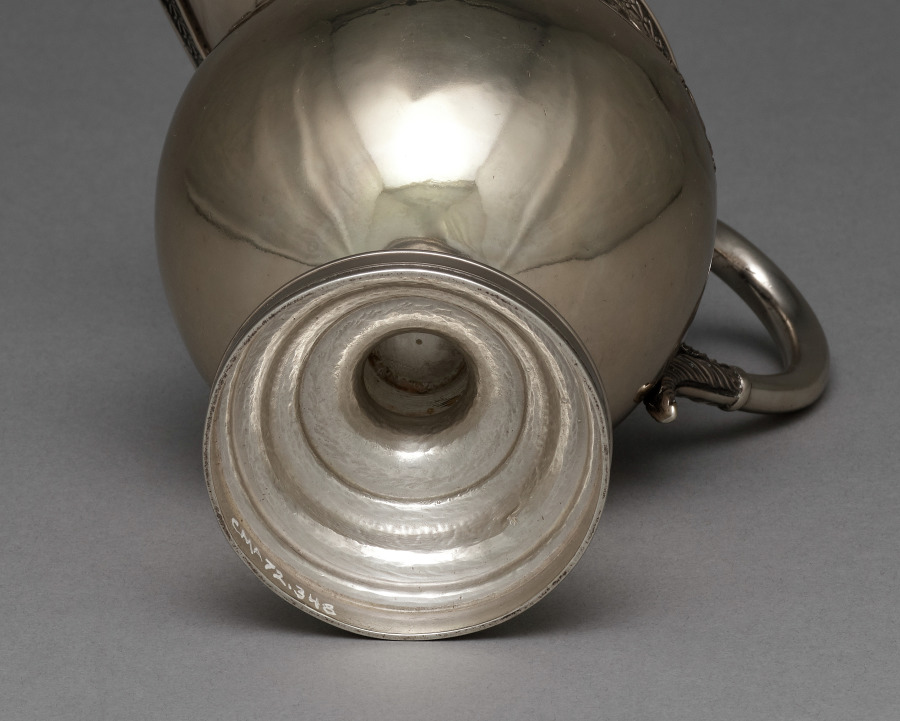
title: Cream Jug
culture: America, Pennsylvania, Philadelphia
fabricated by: Harvey Lewis (American, 1835)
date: c. 1811–25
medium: silver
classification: Silver